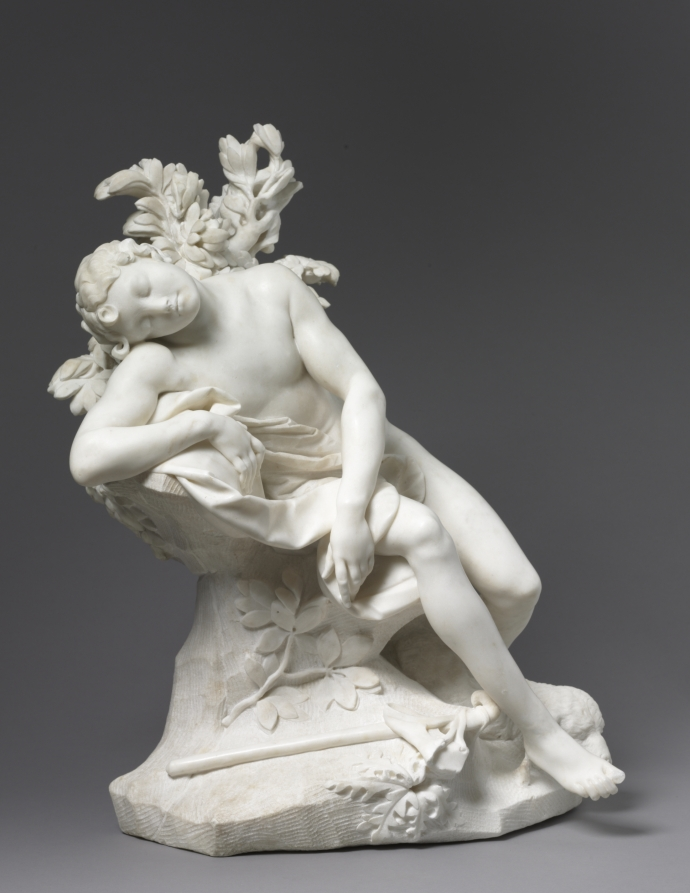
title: Sleeping Endymion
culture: Italy, 18th century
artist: Agostino Cornacchini (Italian, 1686–1754)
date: 1716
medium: marble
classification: Sculpture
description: Cornacchini moved away from the dramatic movement and light effects characteristic of baroque sculpture toward a calmer, gentler, more graceful style favored by 18th-century taste. This sculpture depicts Endymion, a beautiful young shepherd from Greek mythology. His beauty so entranced Selene, the personification of the moon, that she asked Zeus to grant Endymion immortality. Zeus did so, but only after placing Endymion in an eternal sleep.